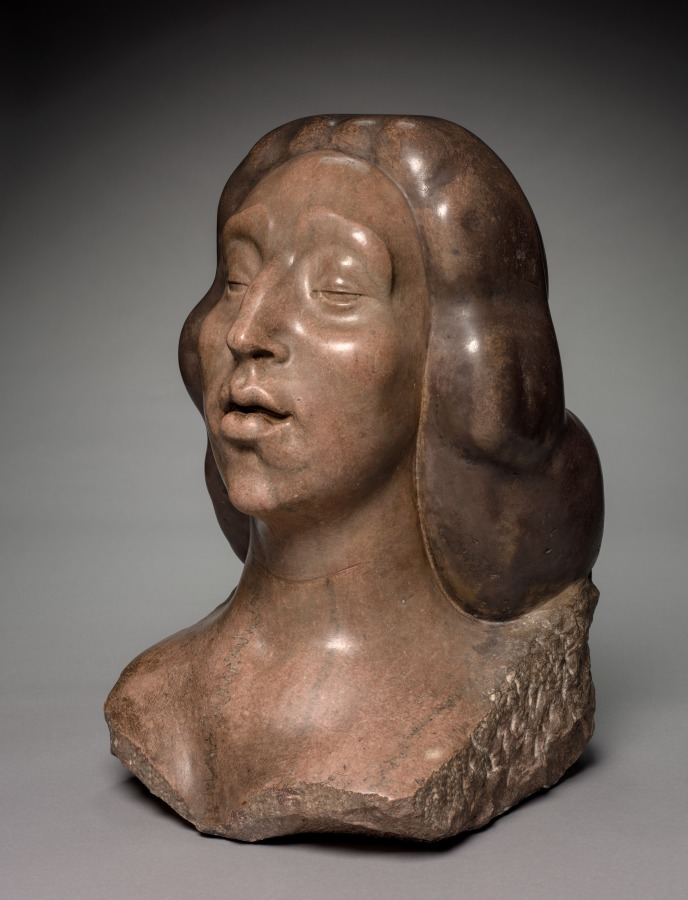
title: Head of Woman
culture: America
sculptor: Gaston Lachaise (American, born France, 1882–1935)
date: 1920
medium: pink Tennessee marble and black pigment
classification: Sculpture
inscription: Signed on base: G. LACHAISE 1923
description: Gaston Lachaise acknowledged that his wife, Isabel Dutaud Nagel Lachaise, was "the primary inspiration which awakened my vision and the leading influence that has directed my forces." Head of a Woman is one of several sculpted portraits he made of her.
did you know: Born in Paris, France, Gaston Lachaise immigrated to the United States in 1906.